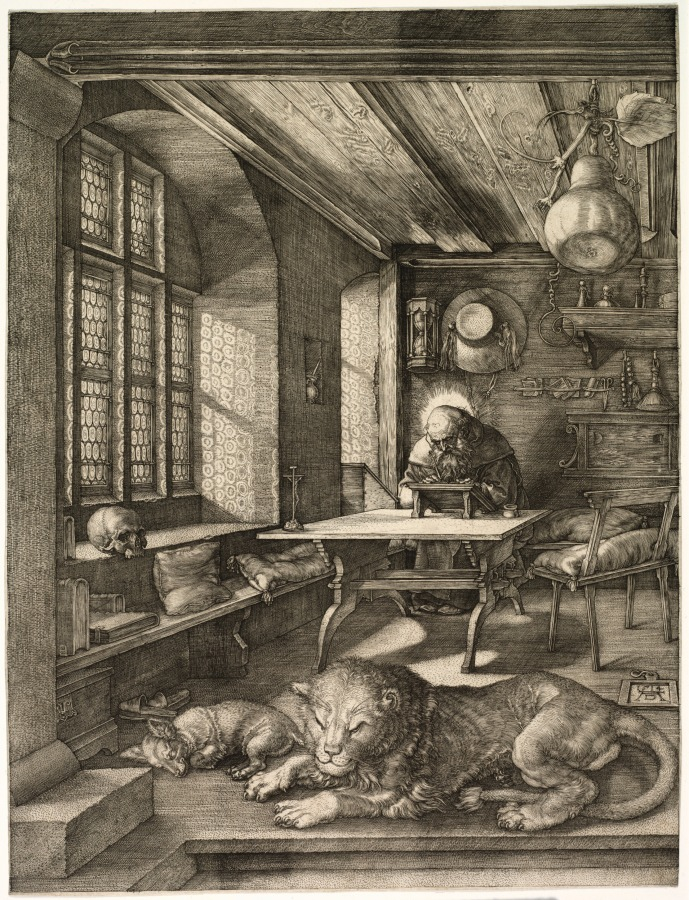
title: St. Jerome in his Study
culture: Germany, late 15th-early 16th century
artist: Albrecht Dürer (German, 1471–1528)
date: 1514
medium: engraving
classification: Print